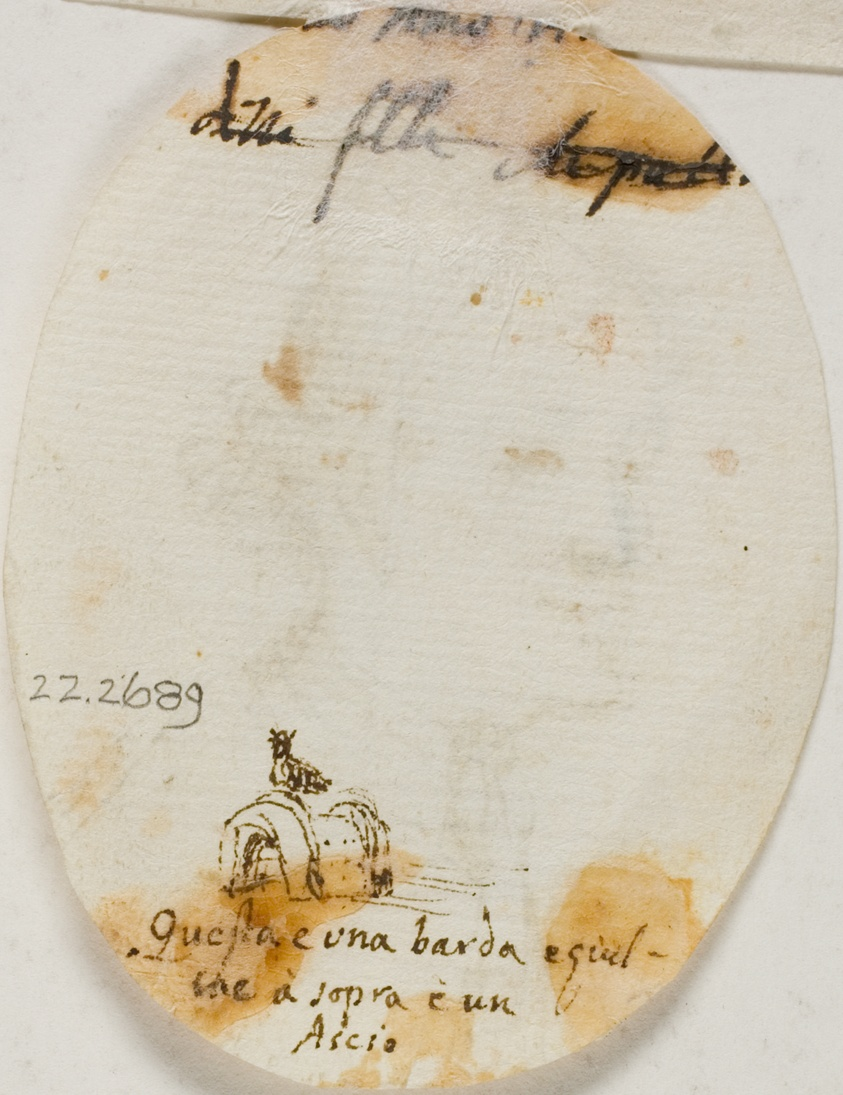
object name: Drawing and Watercolor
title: Portrait Bust of Man Wearing Cravat (recto); Sketch of Saddle (verso)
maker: Style of Stefano della Bella; Italian, 1610-1664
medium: Pen and brown ink (recto), and red and brown ink (verso), on ivory laid paper, cut to oval, tipped onto ivory laid paper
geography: Italy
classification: drawings (visual works); prints and drawing